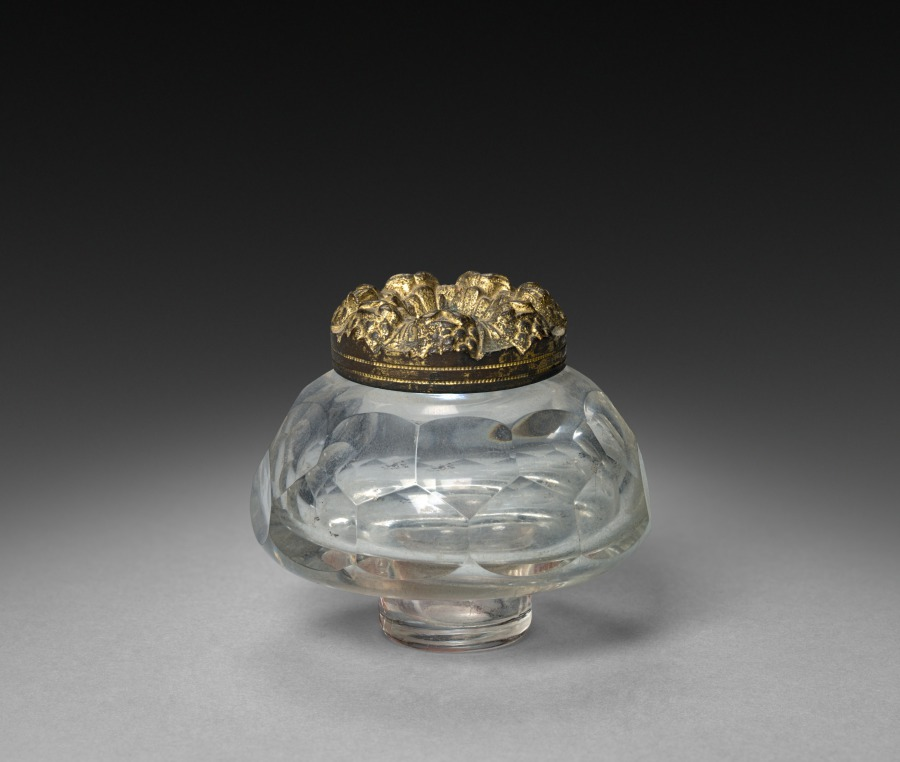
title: Inkwell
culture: England or America, 19th century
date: 1825–1850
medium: gilt bronze and glass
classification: Metalwork